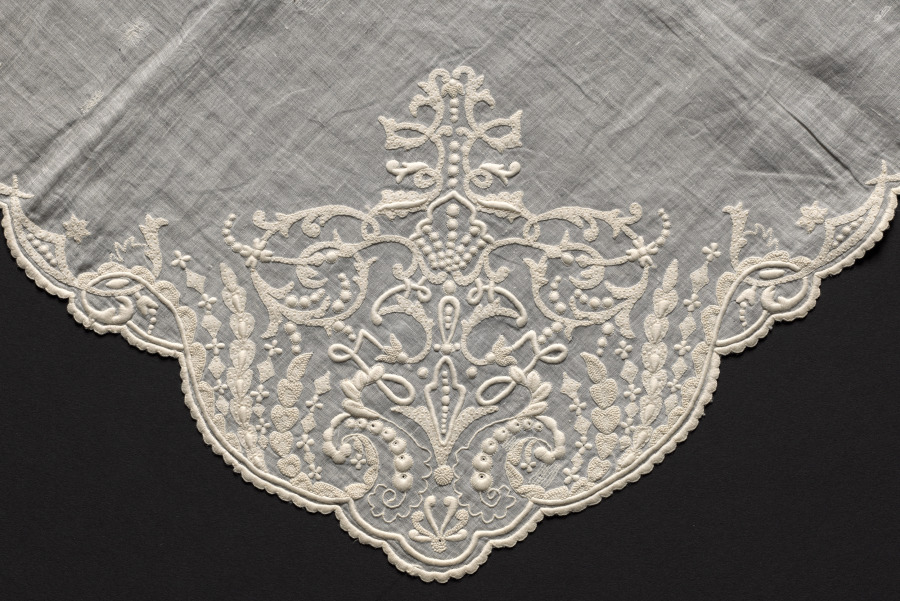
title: Embroidered Handkerchief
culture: Italy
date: 1800s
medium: Plain weave linen, embroidered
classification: Embroidery